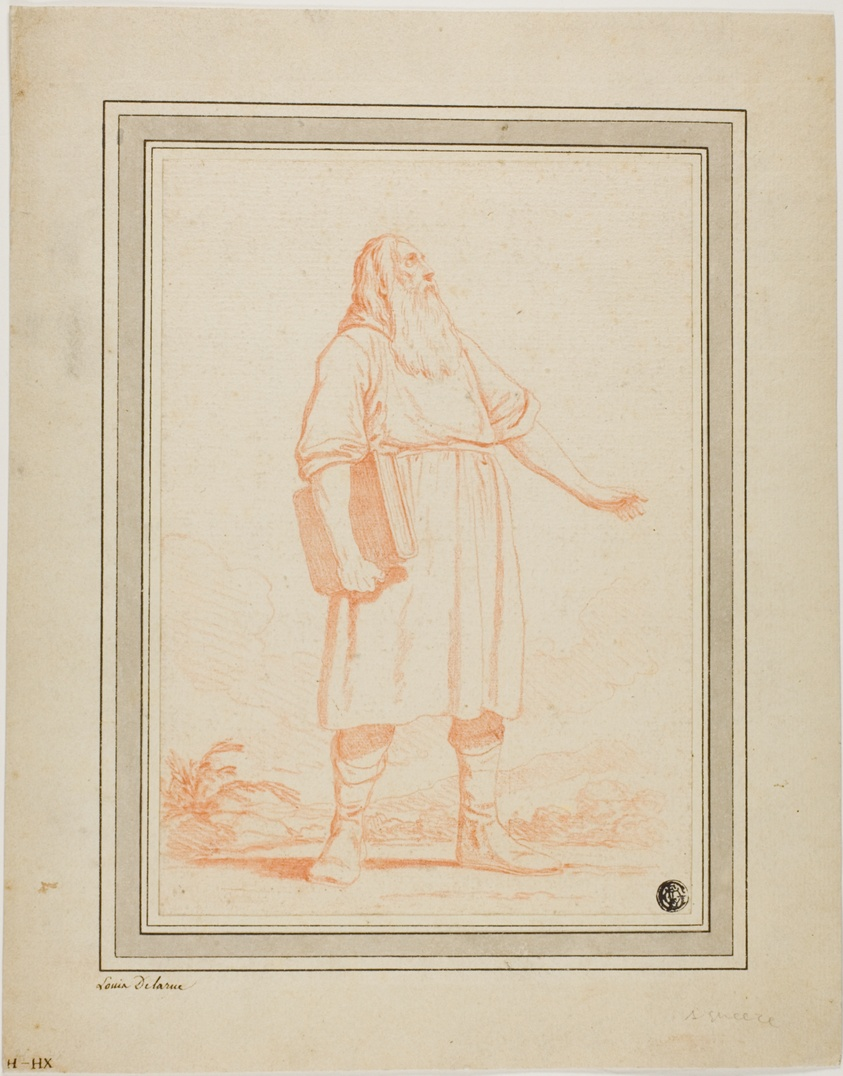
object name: Drawing and Watercolor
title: Standing Bearded Man Holding Book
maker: Attributed to Louis Félix Larue, the younger; French, 1731-1765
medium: Red chalk with stumping, on cream laid paper laid down on cream laid card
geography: France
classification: chalk; drawings (visual works); prints and drawing